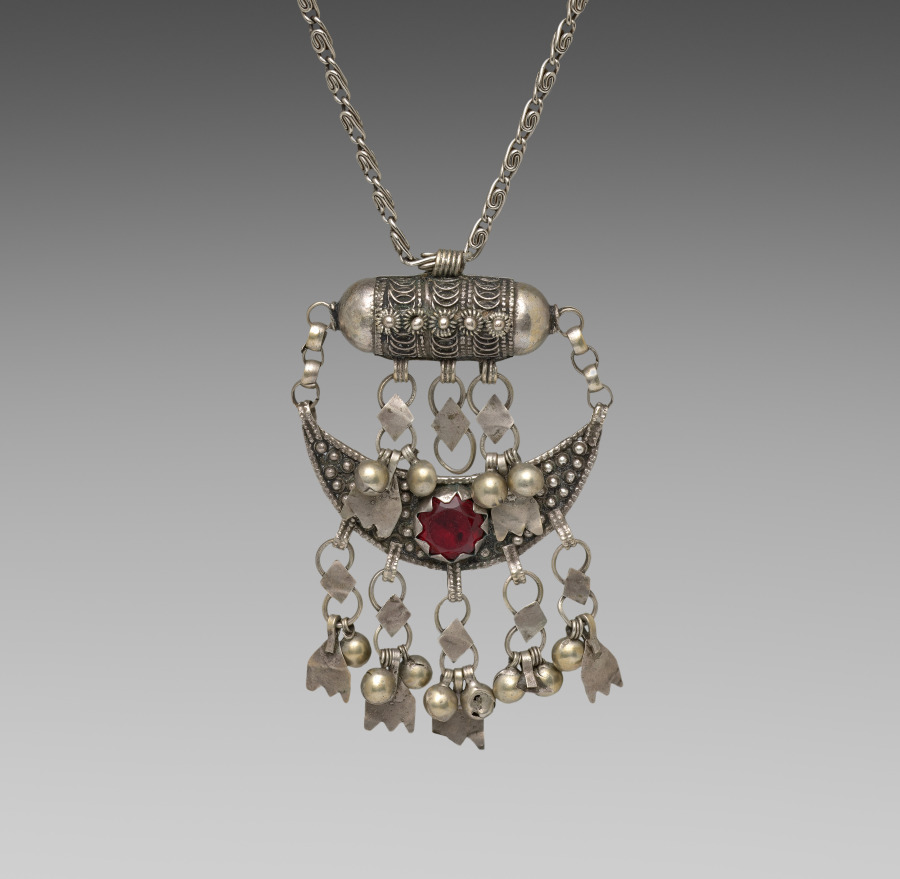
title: Necklace with pendant (waqari or wakari?)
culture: East Africa, probably Harar, Ethiopia, unknown silversmith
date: likely early to mid-1900s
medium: silver alloy, glass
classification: Jewelry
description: Ornate filigree jewelry was historically made in Ethiopia for royals and nobility by specialized silversmiths trained through long apprenticeships. This elaborate pendant necklace (waqari) probably made and worn in the Muslim city of Harar. Muslim women wore such massive jewelry, which holds aesthetic links to nearby Yemen. Its half-moon pendant is a protective crescent shape and its upper filigreed capsule is an amulet. The crescent symbol has existed as a talismanic form in Ethiopia since the Aksumite Empire (1–700s CE).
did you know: Silversmiths also made objects for religious and royal use, like crowns and crosses.